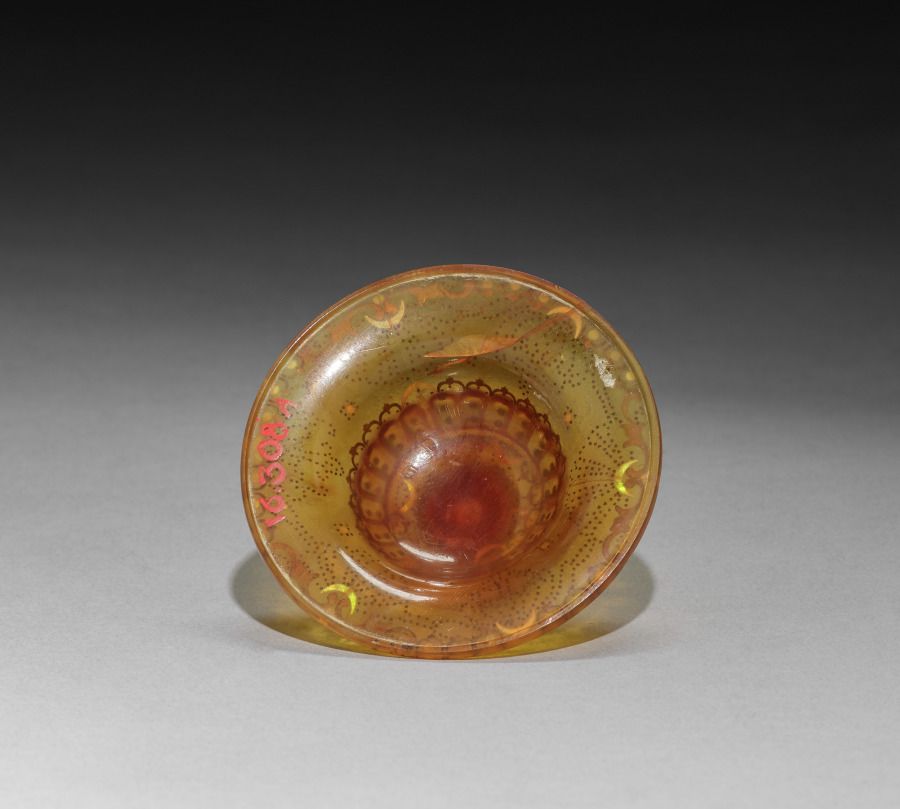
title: Cover for a Cup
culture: France, 18th century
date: c. 1730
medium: amber decorated with inlaid gold and mother-of-pearl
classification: Miscellaneous